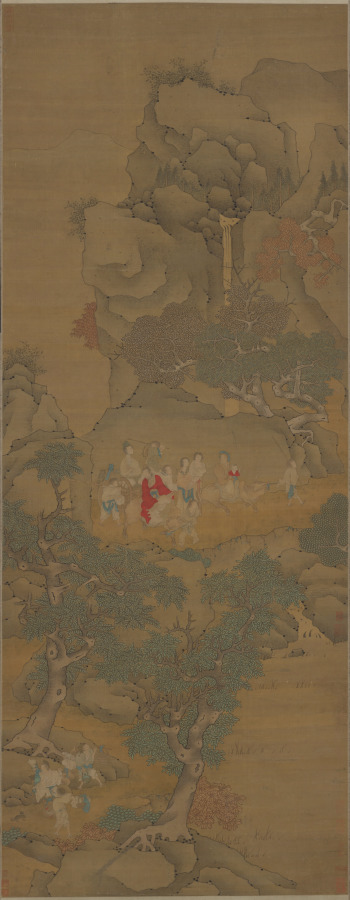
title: Xu Jingyang Moving His Family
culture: China, Ming dynasty (1368–1644)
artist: Cui Zizhong (Chinese, 1574–1644)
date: 1644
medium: Hanging scroll; ink and color on silk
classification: Painting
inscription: Artist's 2 seals: Pei-hai, Cui Zizhong yin.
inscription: 9 additional seals: 2 of Xiang Yuan (18th-19th c.); 1 of Tang Zuomei (late 18th-19th c.); 1 of Zhang Heng 張珩 (1915-1963); 1 of C. C. Wang 王季遷 (1907–2003); 4 unidentified.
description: Xu Jingyang was a dedicated fourth-century Confucian official who allegedly turned into a Daoist immortal. This scroll depicts the legend that when he attained immortality, he took his entire household, including chickens and dogs, to paradise. Cui Zizhong’s painting style intentionally referenced ancient masters. Typical of the pre-Song dynasty landscape tradition, there is the use of blue and green colors and an emphasis on outline rather than texture. While the trembling outlines are reminiscent of earlier painters, the flickering light on rocks and trees is a stylistic feature of Cui’s own time.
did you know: Xu Jingyang, wearing red, is in the upper register of figures, while below his servants transport a rooster, dog, and other supplies.